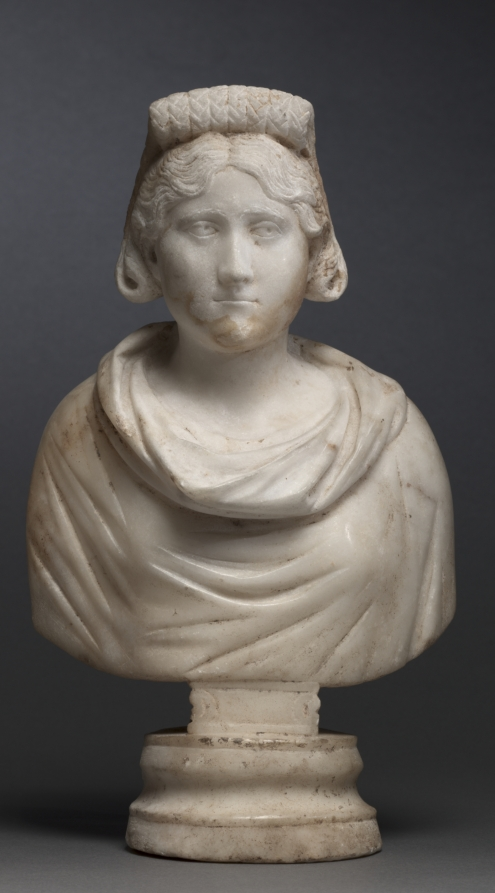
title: Portrait Bust of an Aristocratic Woman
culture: Anatolia, late Roman-early Christian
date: 280–90 CE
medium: marble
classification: Sculpture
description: These three pairs of marble portrait busts depict an aristocratic Roman couple. They are unique in representing the same couple three times with only minor variations in costume. Allegedly found together with the Jonah Marbles, they may represent the Christian patrons who commissioned the Jonah cycle.